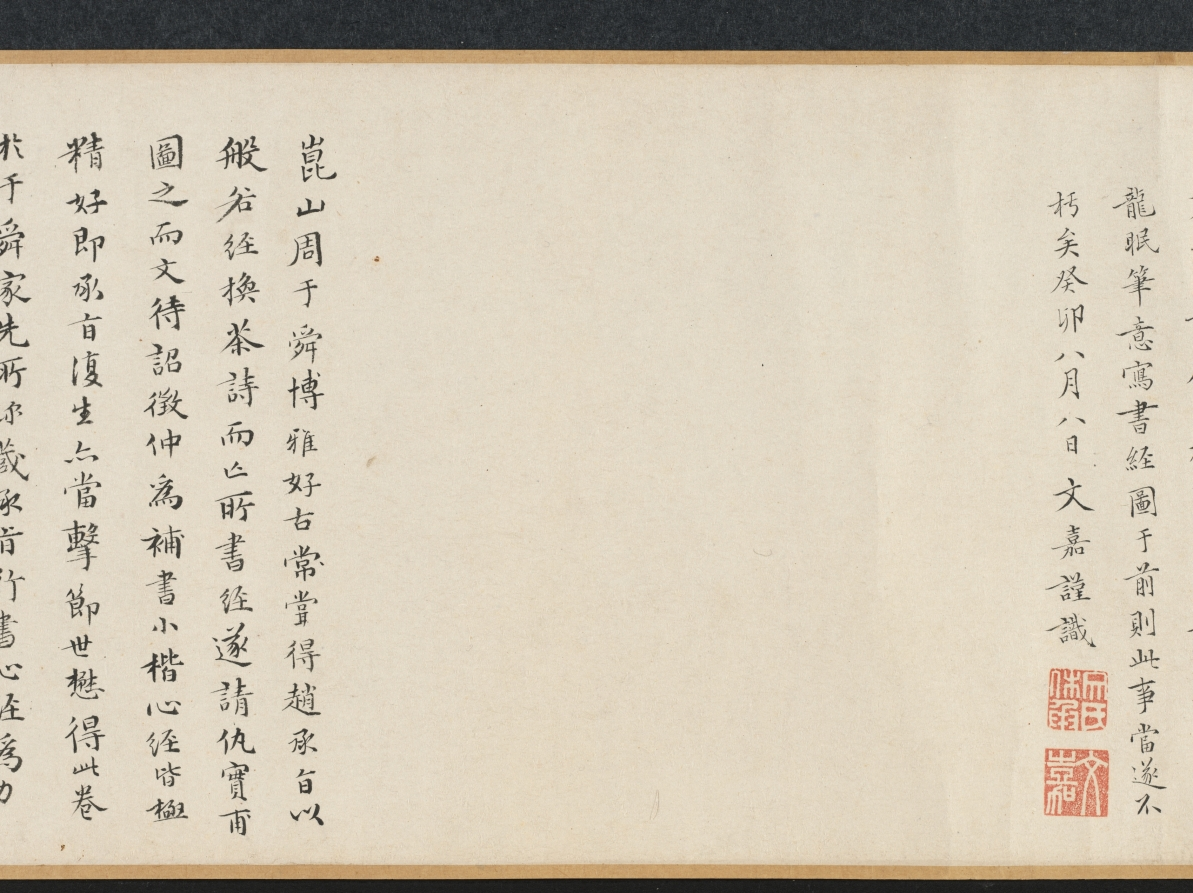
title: Zhao Mengfu Writing the Heart (Hridaya) Sutra in Exchange for Tea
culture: China, Ming dynasty (1368–1644)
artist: Qiu Ying (Chinese, 1494–1552)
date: 1542–43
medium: handscroll, ink and light color on paper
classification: Painting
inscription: Inscription accompanying text of "Heart" sutra, by Wen Zhengming 文徵明 (1470-1559): Zhengming 徵明, written in a boat at Kunshan 崑山, on the twenty-first day of the ninth month, in the renyin 壬寅 year, the twenty-first year of the Jiajing era [1542].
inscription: Colophon by Wang Shih-mou: Chou Yü-shün [Feng-lai] of K'un-shan was a scholarly, refined connoisseur of antiquities. He had acquired the poem written by Chao Ch'eng-chih [Chao Meng-fu] about the exchage of tea for Chao's calligraphy of the Prajna sutra. But the sutra itself, also written by Chao Meng-fu, is lost. He therefore asked Ch'iu Shih-fu [Ch'iu Ying] to do a painting and had Wen Cheng-ming, the artist-in-attendance, write the Hridaya Sutra in the "small, regular" style for replacement. Both works are so excellent that even Chao Meng-fu himself would certainly applaud if he should be reborn to see them. I, Shih-mou, had gotten possession of this scroll from the family of Chou Yü-shün, and since it was so wonderfully matched with one of the treasures in my collection. the Hridaya Sutra written by Chao Meng-fu for Priest Li in "running script," like the reuniting of two halves of a jade pi, I completed the scroll with the several colophons written for the "tea-exchange" poem. I did this because the painting of Ch'iu Ying and the calligraphy of Wen Cheng-ming are definitely masterpieces by themselves with absolutely no need to depend on any of the colophons written for the Chao Meng-fu poem. Furthermore, the two sons of Wen Cheng-ming, Shou-ch'eng [Wen P'eng] and Hsiu-ch'eng [Wen Chia]. have each written a colophon explaining the reason for replacing the calligraphy. As their writings are both acceptable for high standard, I didn't want to throw them away. [So by separating these into two scrolls] I was able to get two complete works of art in one clever stroke. I was quite pleased with myself, and hope that those who see this scroll shall not get suspicious because of the missing colophons. Wang Shih-mou wrote in his Jih-sun-chai study, on the first day of the tenth month, in the chia-shen year of the Wan-li era [1584].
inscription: Colophon by Wen P'eng: I-shao [Wang Hsi-chi] wrote in exchange for a flock of geese. Su Tung-po wrote in exchange for meat. Both episodes have become legends of a thousand years. Sung-hsüeh [Chao Meng-fu] "teased" Priest Kung for tea, and the story was immediately immortalized in the poems by all the famous scholars of the times. Indeed, how could one say his humor and elegance are not equal to the ancient worthies? Unfortunately, the poetry has survived but the writing of the sutra is lost. Yü-shün [Chou Feng-lai] therefore asked my father to make up the writing and so here is the complete work of art. Respectfully inscribed by Wen P'eng in the mid-summer of 1543.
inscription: Colophon by Wen Chia: Sung-hsüeh [Chao Meng-fu], in exchanging tea leaves for his writing of the Prajna, had put himself in the company of Yu-chün [Wang Hsi-chih] who exchanged geese for his writing of the Huang-t'ing sutra [the Yellow Chamber, or the Wai-ching ching, a Taoist text attributed to the Yellow Emperor]. However, was this romantic and cultivated gesture really intended for such small things? Actually, he was only proud that the excellence of his calligraphy had made him worthy to be the successor of the Ch'in Dynasty master. Since, very unfortunately, Chao Meng-fu's writing [of the Prajna] was already lost, my father therefore agreed to replace it, and did the calligraphy in the style of the Yellow Chamber. In addition, Yu-shün [Chou Feng-lai] had asked Mr. Ch'iu Shih-fu [Ch'iu Ying] to do a painting of the sutra writing story in the style of Li Lung-mien at the head of the scroll. Now it would seem the entire episode should go down in history for immortality. Respectfully recorded by Wen Chia, on the eighth day of the eighth month, in the year of k'uei-mao [1543]. trans. WKH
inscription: 4 colophons and 23 seals: 1 colophon, dated 1543, and 2 seals of Wen Peng (1498-1573); 1 colophon, dated 1543, and 2 seals of Wen Chia (1501-1583); 1 colophon, dated 1584, and 3 seals of Wang Shih-mou (1536-1588); 2 seals of Chou Feng-lai (16th c.); 3 seals of Sung Lo (1634-1713); 5 seals of the Ch'ien-lung emperor (r. 1736-95); 1 colophon, dated 1902, and 1 seal of Fei Nien-tz'u (1885-1905); 4 seals of Wan-go H. C. Weng (b. 1918); 1 seal unidentified.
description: The Yuan dynasty calligrapher Zhao Mengfu (1254–1322) is said to have transcribed the Heart Sutra for a certain priest named Li in exchange for tea. Later, during the Ming dynasty, the professional painter Qiu Ying from Suzhou painted this scene for his patron. Here, Zhao Mengfu holds a brush and has a piece of paper laid out before him. On the table is an ink stone, an ink stick, and a small water dropper. Drops of water would dissolve the ink stick into liquid ink when it was ground on the flat square stone.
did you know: Qiu Ying was born to a peasant family, but his natural talent led him to a successful career as a professional painter with wealthy patrons.